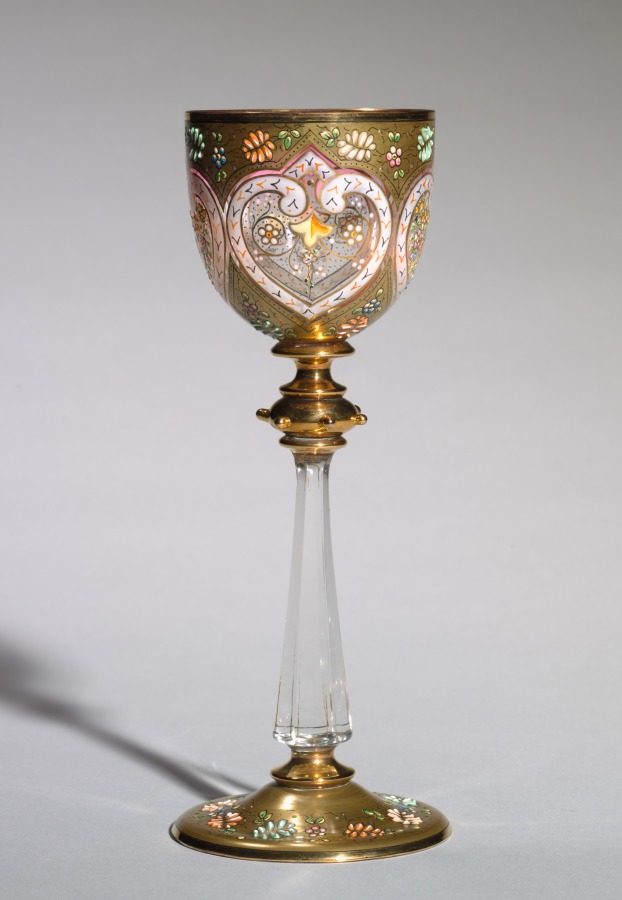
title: Liqueur Glass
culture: Germany, Late 19th- Early 20th century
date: c. 1890–1900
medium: blown glass; gold enamelling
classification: Glass